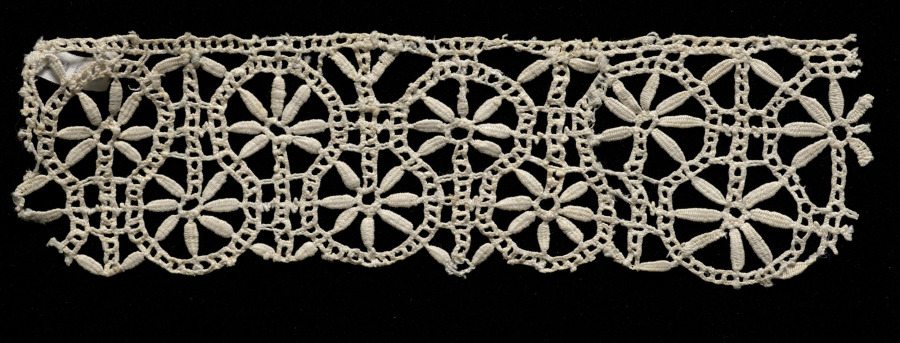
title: Lace Edging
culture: Italy, Genoa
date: 1600s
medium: Bobbin lace (rose lace)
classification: Lace